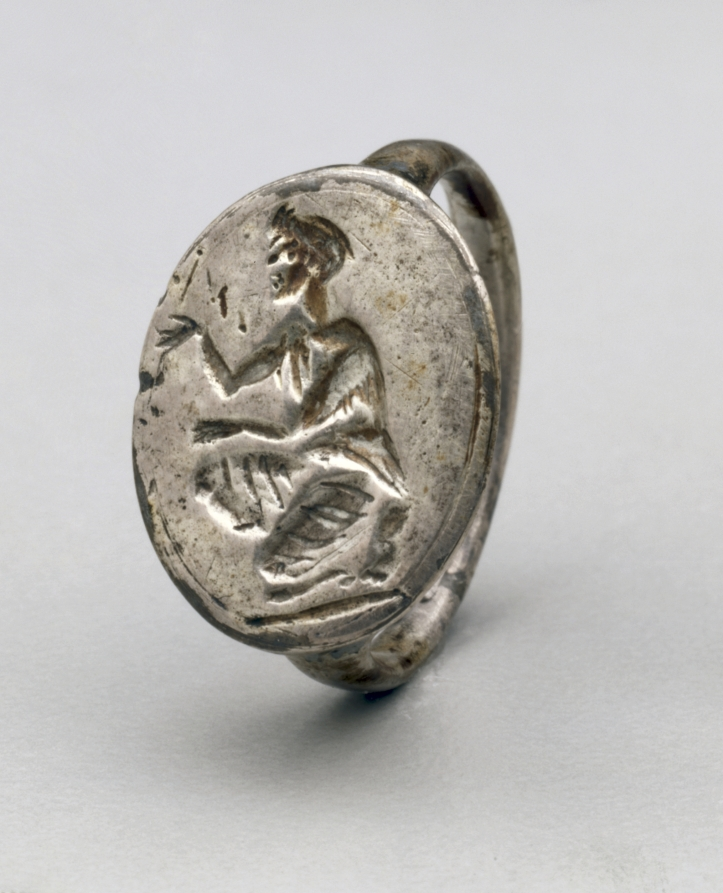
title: Finger Ring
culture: Greece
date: 300s BCE or later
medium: silver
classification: Jewelry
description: This silver signet ring depicts a kneeling figure facing left in a heavy robe, with hands outstretched and wearing a headdress. The figure is probably a priest or priestess making an offering at an unseen altar. Less skilled carving and the worn surface make the image difficult to interpret, especially the object in the figure’s right hand.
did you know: When signet rings were stamped, the image would be reversed on the stamped surface.